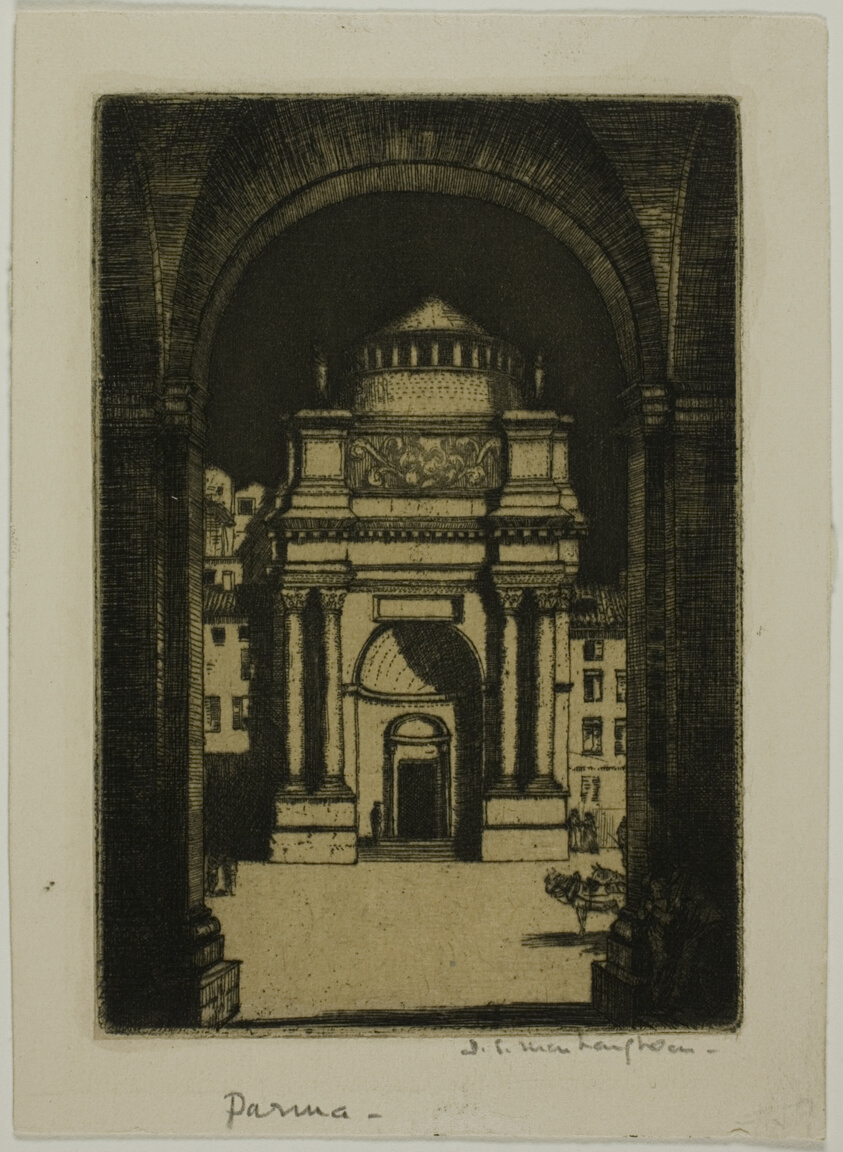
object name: Print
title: Parma, Italy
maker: Donald Shaw MacLaughlan (American, born Canada, 1876-1938)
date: 1904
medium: Etching in black on cream wove paper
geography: United States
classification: etching; print; prints and drawing